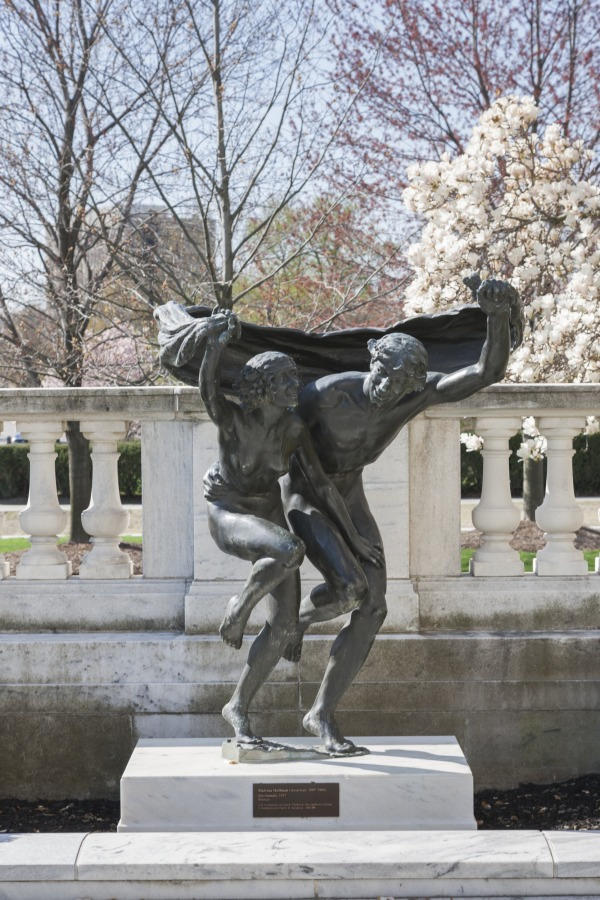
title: Bacchanale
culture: America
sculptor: Malvina Hoffman (American, 1887–1966)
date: 1917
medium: bronze, copper, brass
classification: Sculpture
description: While visiting London, sculptor Malvina Hoffman was electrified by a dance performance featuring Anna Pavlova and Mikhail Mordkin, two highly acclaimed Russian ballet stars. Together the dancers presented a bacchanale, a work inspired by the legendary followers of Bacchus, the ancient Roman god of wine. In this uninhibited and erotically charged piece, both dancers cavorted on stage, their movements accented by grasped veils of gauze. Hoffman’s Bacchanale is her vibrant interpretation of the performance, capturing a fleeting moment in permanent form.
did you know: A second version of this life-size sculpture was installed in the Luxembourg Gardens in Paris, where it was destroyed during the Second World War.